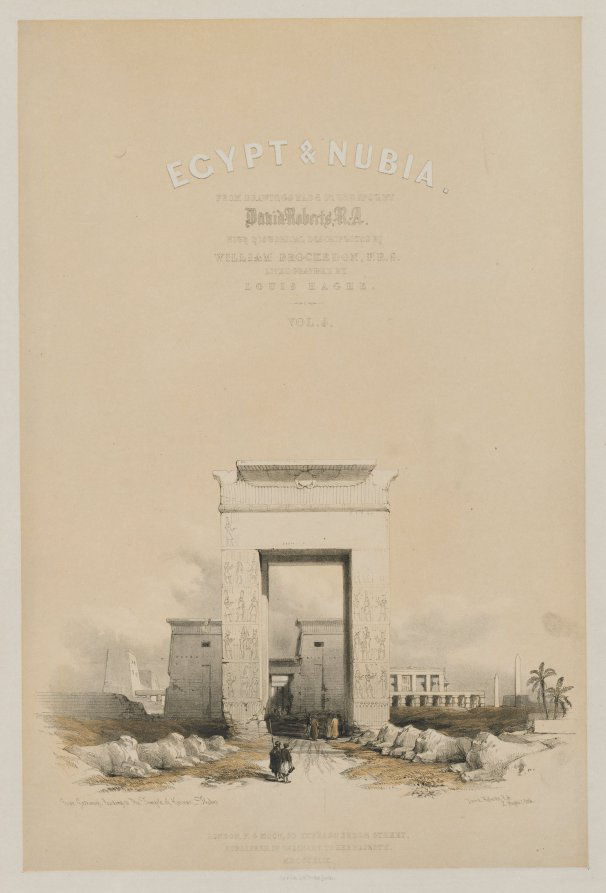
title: Egypt and Nubia: Frontispiece Volume V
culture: England, 19th century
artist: Louis Haghe (British, 1806–1885)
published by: F. G. Moon, 20 Threadneedle Street, London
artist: after David Roberts (Scottish, 1796–1864)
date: 1849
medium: color lithograph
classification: Print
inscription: Vol. 5 on the frontispiece, not Vol. 2. Do not know what this is because Egypt and Nubia has only three volumes. This needs to be checked because the frontispieces have been identified for all three volumes and are included in this document.